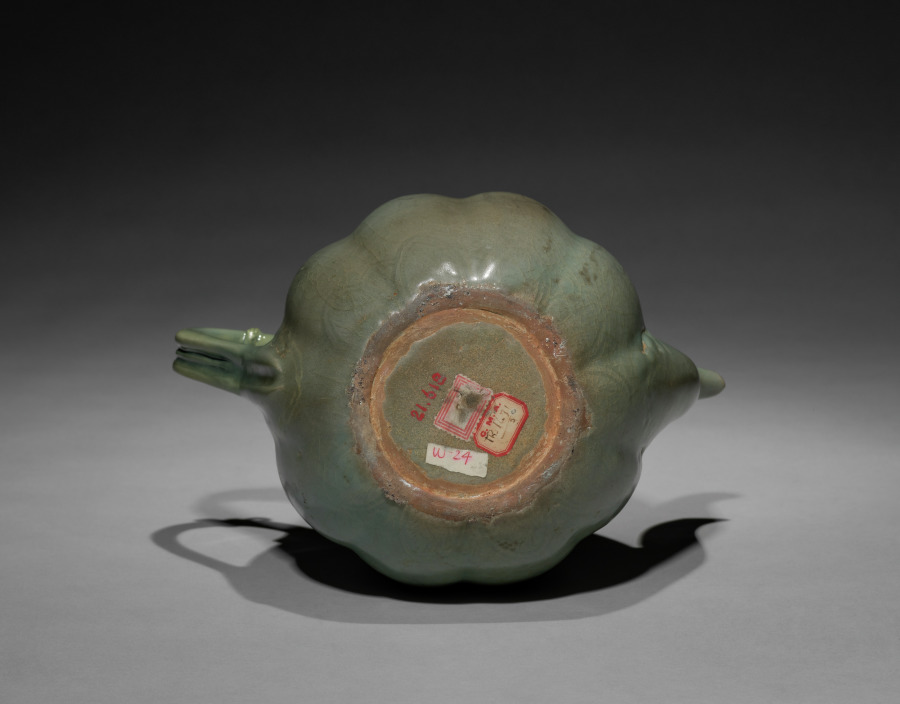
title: Melon-shaped Ewer with Incised Peony Design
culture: Korea, Goryeo dynasty (918–1392)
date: 918–1392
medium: pottery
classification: Ceramic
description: This melon-shaped pitcher is adorned with a delicate drawing that renders chrysanthemum buds with full blossoms in white and black inlays. In Korea, chrysanthemum flowers and leaves were made into both tea and wine. Chrysanthemum wine was enjoyed during the the Double Nine Festival (the ninth day of the ninth month in the lunar calendar) when praying for longevity.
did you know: The shape of this pitcher resembles a type of yellow muskmelon cultivated mainly in East Asia.